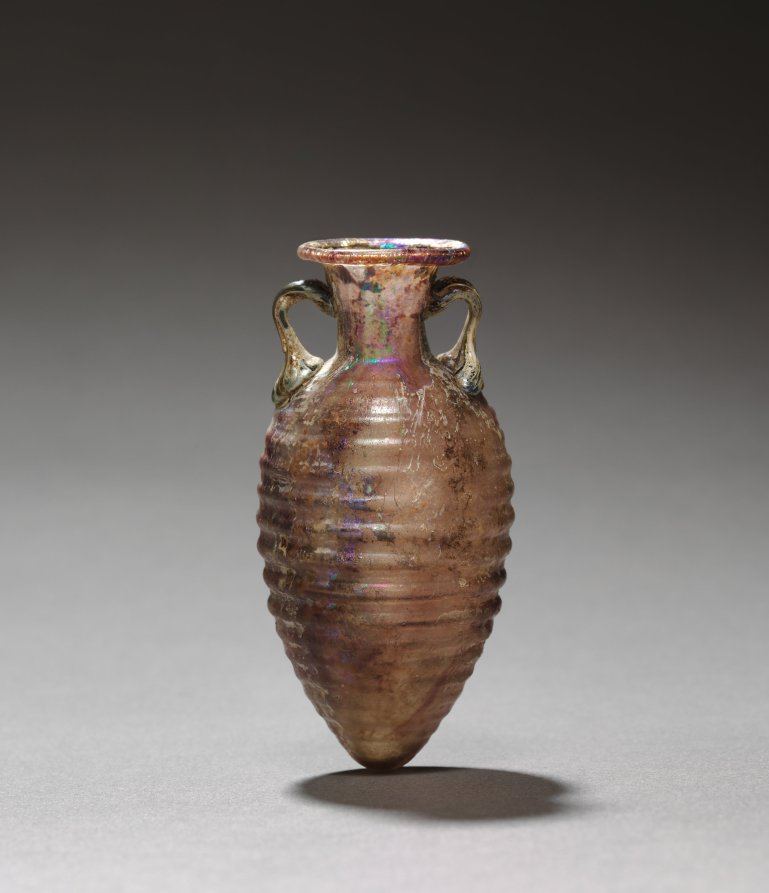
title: Amphoriskos (Small Amphora)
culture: Roman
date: 50–100 CE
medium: glass, mold-blown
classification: Glass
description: First blown in a mold, then supplied with separately made handles, this small vessel likely held perfumed oil, a valuable commodity. Originally violet in color, its surface is now partially marred by areas of buff and iridescent weathering. The finely ribbed body is quite elegant, however, and its extravagant modern box attests to its significant value for a modern owner (prior to 1919).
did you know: Although much smaller, glass amphoriskoi (“small amphorae”) are similar in form to ceramic transport amphorae.